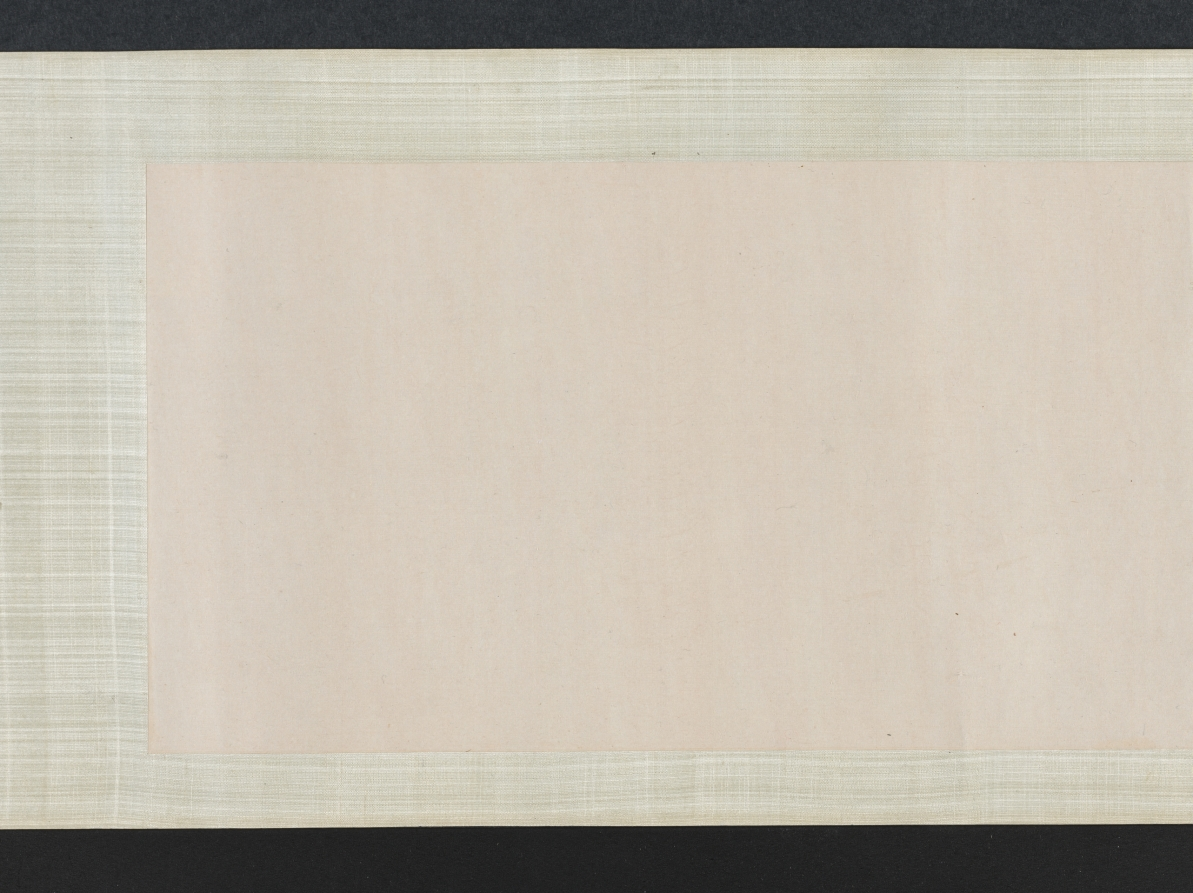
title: Saying Farewell at Xunyang (Song of the Pipa)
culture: China, Ming dynasty (1368–1644)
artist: Wen Boren (Chinese, 1502–1575)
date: 1500s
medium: handscroll, ink and color on paper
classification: Painting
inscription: "潯陽送客圖" 五峰山人文伯仁寫于停雲館中 [印] 文伯仁; 五峰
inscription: 2 colophons and 9 additional seals: 1 transcription of "Pipa xing 琵琶行” (Song of Pipa) and 3 seals of Zhu Yizun 朱彜尊 (1629-1709); 2 seals of Wu Rongguang 吳榮光 (1773-1843); 1 colophon, dated 1826, and 3 seals of Wu Xijia 吳錫嘉 (mid-1700s)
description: This handscroll depicts The Song of the Pipa, a poem by Bai Juyi 白居易 (772–846) written after the poet’s encounter with a pipa player on the Yangzi River. Expelled from her home city when her beauty and fame had faded, she played for the poet at night. Her musical performance and tragic life story resonated with Bai Juyi, who had just been demoted and exiled from life at court himself. The hazy, vast view and pale color tonalities of this painting illustrate these feelings of endless sadness, having lost one’s sense of purpose in life.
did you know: Wen Boren depicted the chilly autumn water with a fishnet pattern.